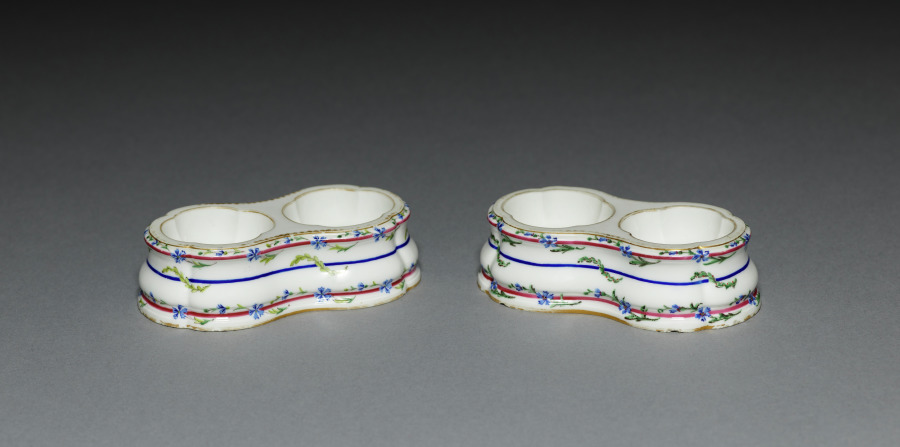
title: Pair of Double Salt Dishes (Paire de salières)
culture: France, Sèvres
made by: Sèvres Porcelain Factory (French, est. 1756)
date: 1790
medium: Hard-paste porcelain with enamel and gilt decoration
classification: Ceramic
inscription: 1964.519.1: Interlaced Ls with date letter 'NN' to the right, mark for Jean-Nicolas Le bel, jeune, père to the left, incised 'os' (the 's' is upside down); 1964.519.2: Interlaced Ls with date letter 'NN,' mark for Charles-Théodore Buteux below, incised 'os' (the 's' is upside down)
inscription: [Incised "OS", left]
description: This double-salt cellar was added to a 525 piece dinner and dessert service commissioned by French King Louis XVI and known as the guirlandes de barbeaux (garlands of cornflowers) service. Between 1783 and 1790 broken or damaged objects from this service were replaced on an annual basis. Objects in this service were made of both soft and hard-paste porcelain, the latter made possible by the discovery of the ingredient kaolin in France in 1768-69.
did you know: This double-salt cellar would have held salts as well as a variety of spices such as pepper, nutmeg, and cinnamon.